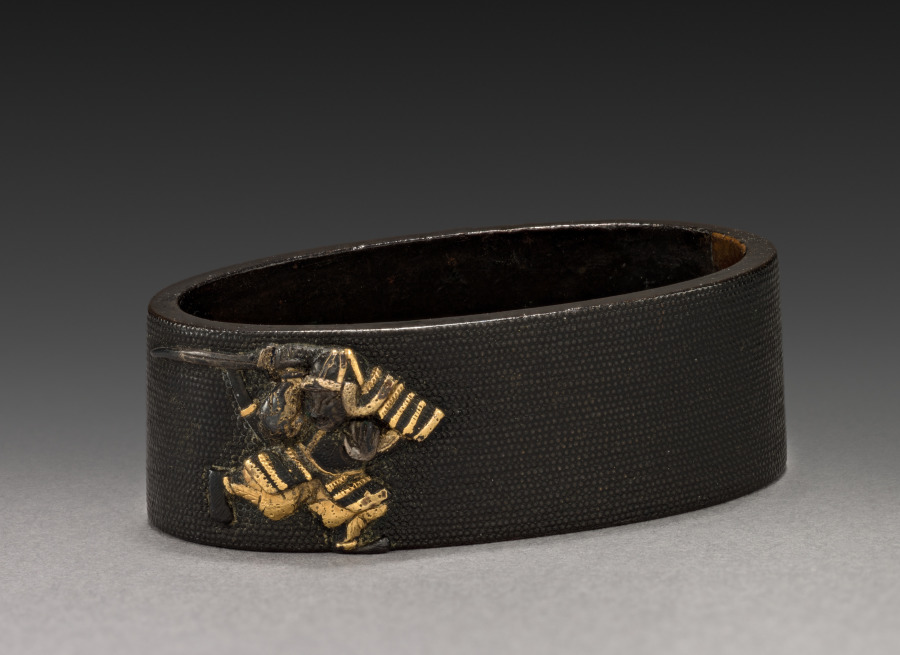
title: Sword-Hilt Collar (Fuchi)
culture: Japan, Edo period (1615–1868)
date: 1700–1850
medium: shakudo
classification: Arms and Armor